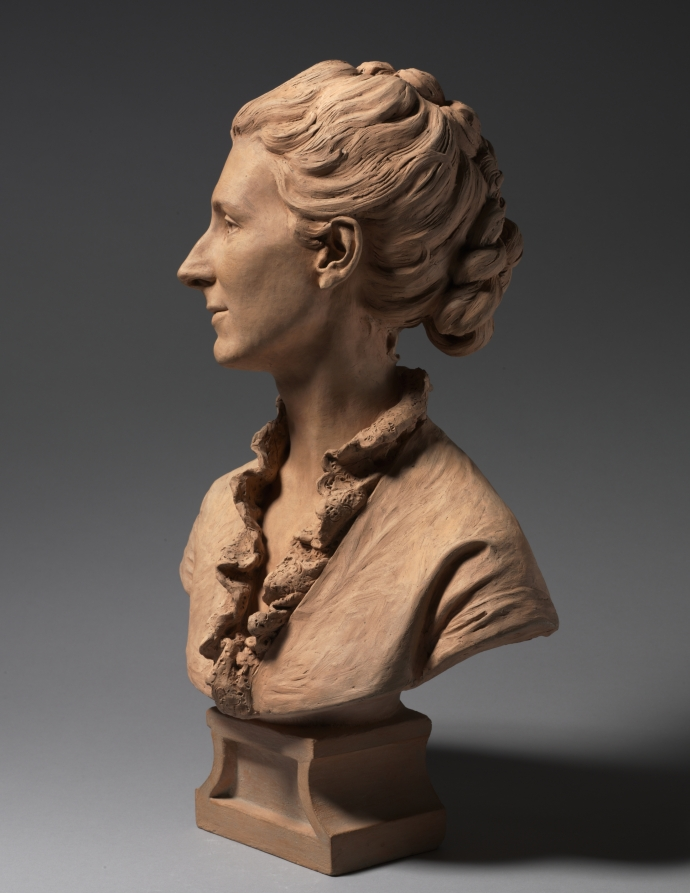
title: Bust of a Lady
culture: France, 19th century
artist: Jules Dalou (French, 1838–1902)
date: c. 1875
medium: terracotta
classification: Sculpture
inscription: Signed beneath right shoulder: "DALOU/1875"